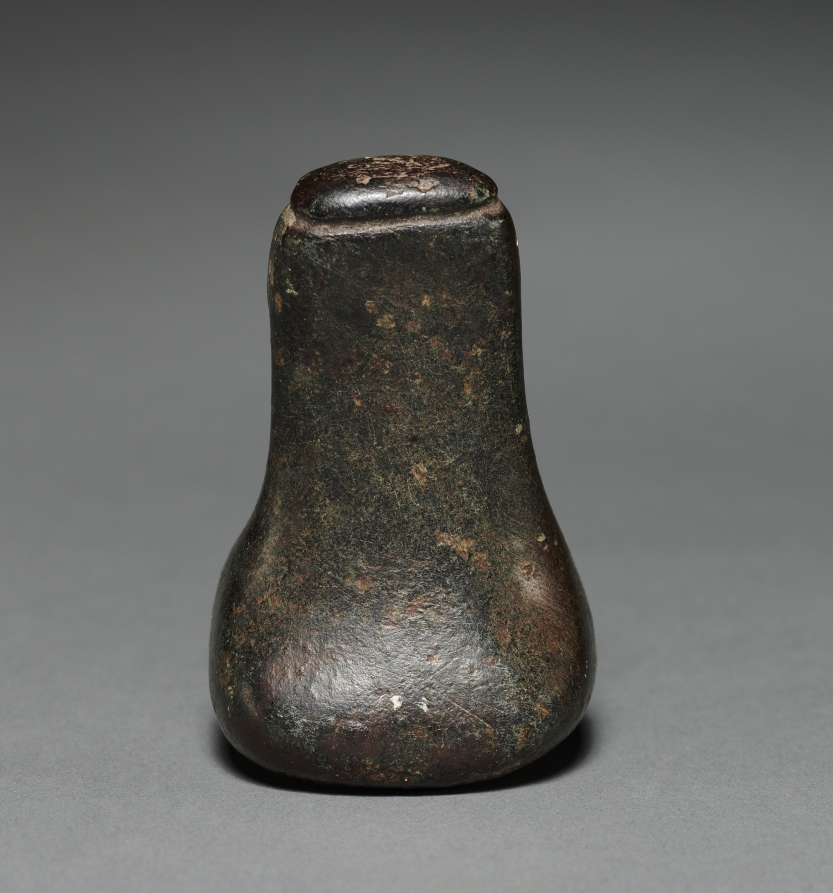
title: Pelican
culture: America, North American Indian, Channel Islands, Island of San Nicolas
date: 1800s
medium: stone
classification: Sculpture